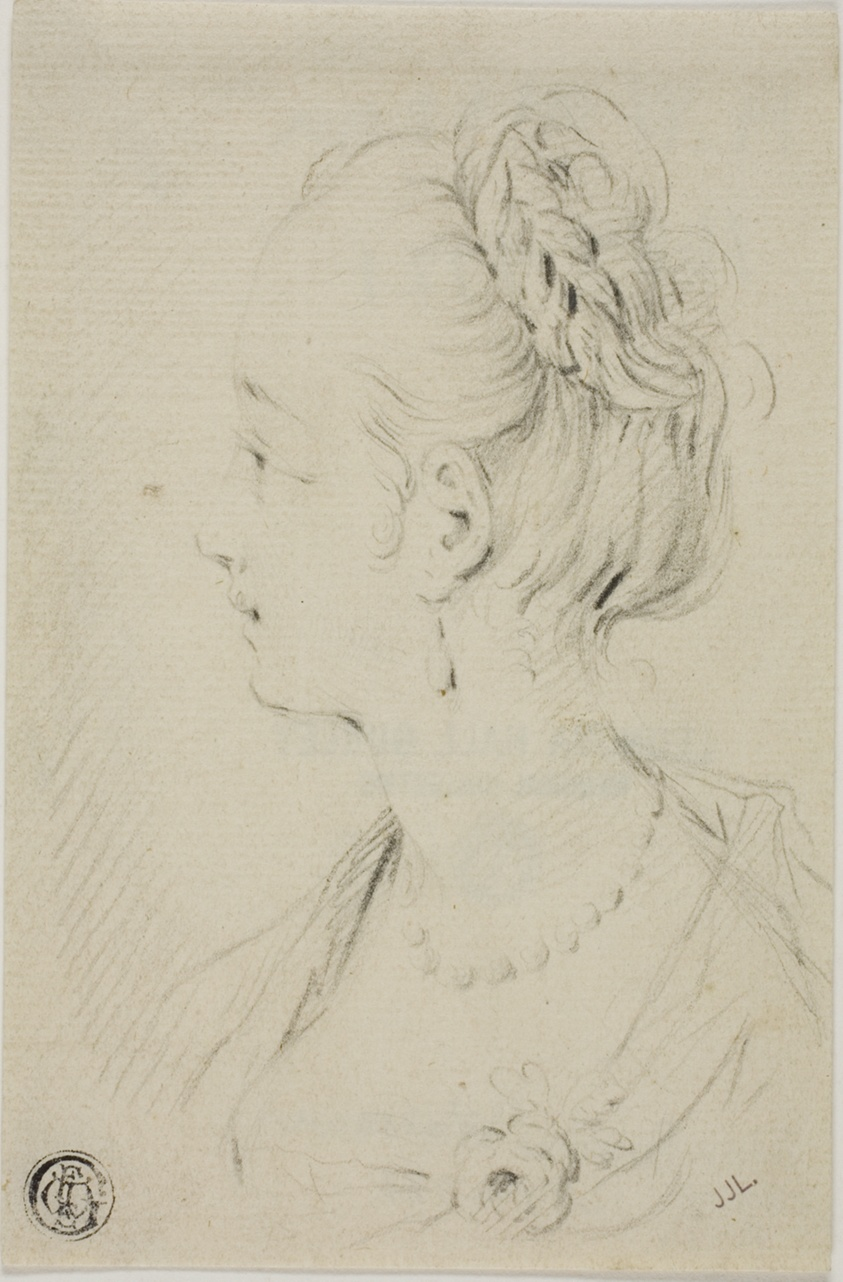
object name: Drawing and Watercolor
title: Profile Bust of Young Woman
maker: After François Boucher (French, 1703-1770); or after Jean Antoine Watteau (French, 1684-1721)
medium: Graphite on ivory laid paper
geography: France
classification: drawings (visual works); paper; graphite; prints and drawing